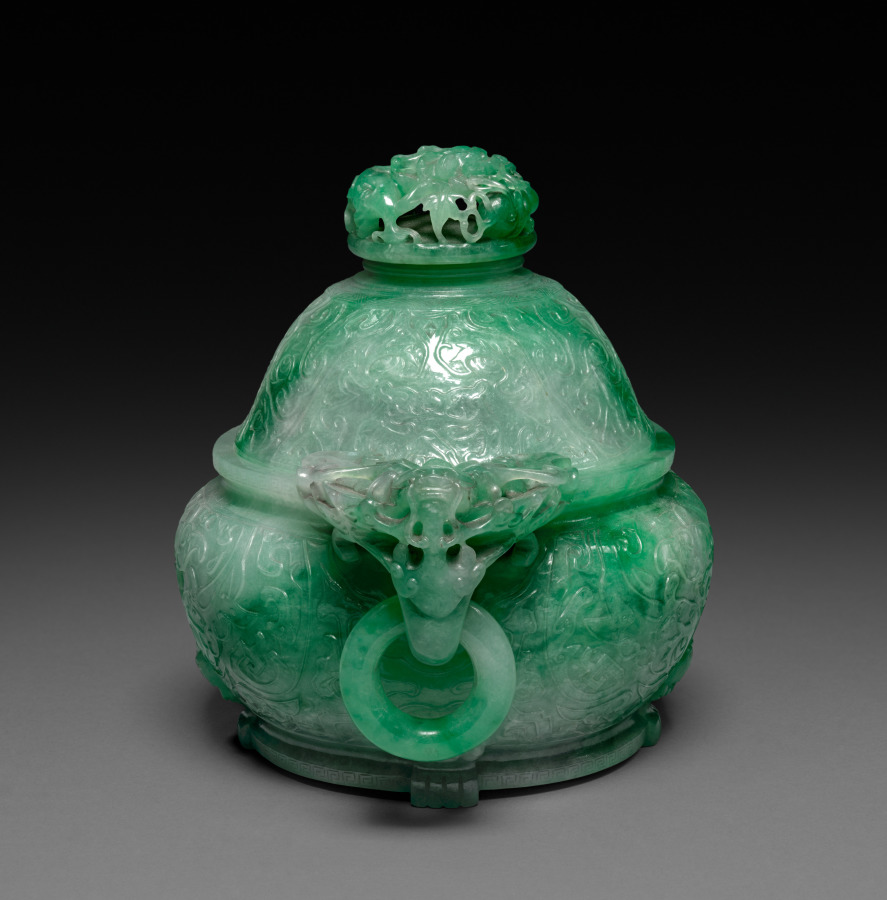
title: Incense Burner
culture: China, Qing dynasty (1644–1911), Qianlong reign (1736–95)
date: 1736–95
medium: jade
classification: Jade